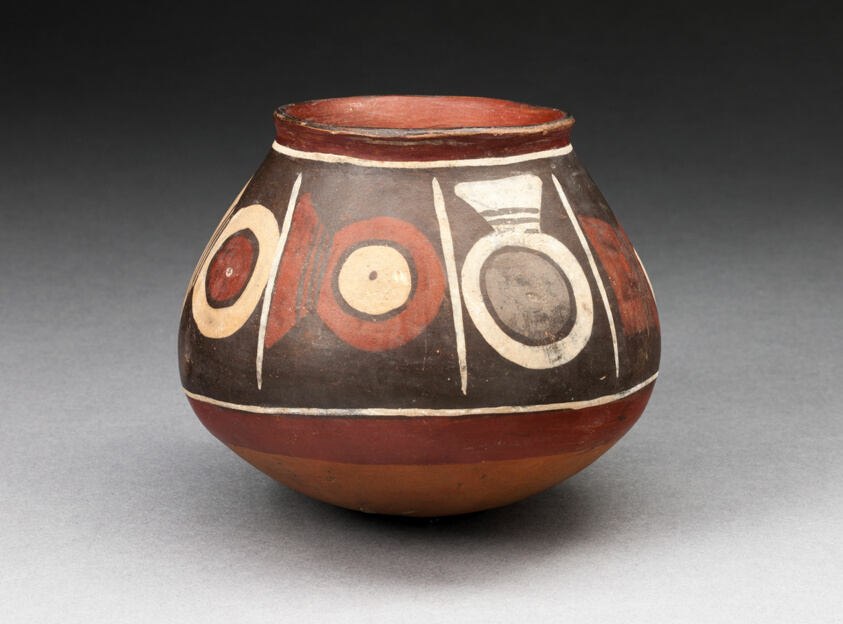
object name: Vessel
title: Bowl with a Horizontal Band of Circular Motifs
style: nazca, early intermediate period, Pre-Columbian, americas, Arts of the Americas, andean, andes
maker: Nazca; South coast, Peru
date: 180 BCE–500 CE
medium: Ceramic and pigment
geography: Nazca Valley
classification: bowl; earthenware; art of the americas; ceramics; vessel